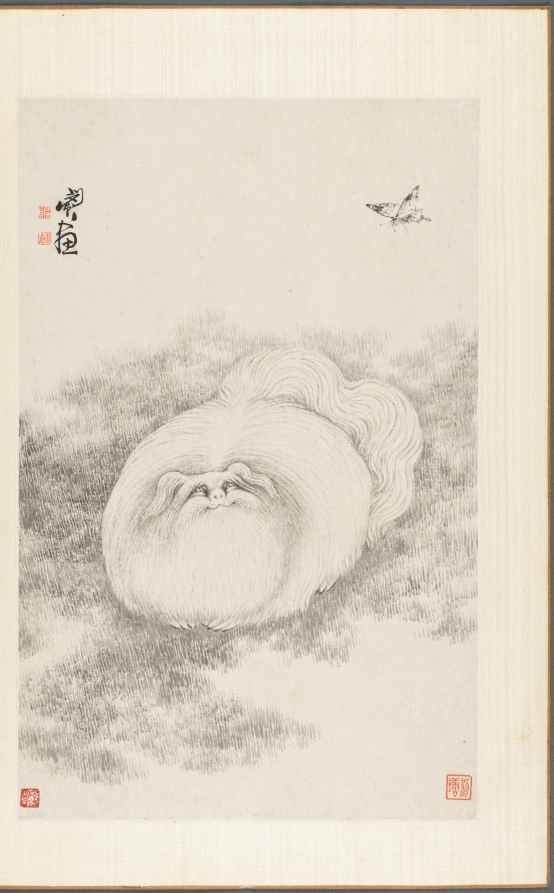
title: Cat and Butterfly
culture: China, Qing dynasty (1644-1911)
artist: Min Zhen (Chinese, 1730–after 1788)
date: 1788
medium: album leaf, ink on paper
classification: Painting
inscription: Six seals appearing on the leaves: Min Zhen 閔貞; Zheng zhai 正齋; Qingqiao 青橋; Zhen 貞; Liao tang 蓼塘; Min Zhen zhi yin 閔貞之印。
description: Min Zhen, who was orphaned at age 12 and developed an eccentric personality, was trained by Tang Yin (1682–1756), a writer, playwright, and superintendent of the imperial porcelain workshops in Jingdezhen. The connection to him may have enabled Min to stay in Beijing for a decade from around 1773. It is not clear whether he ever resided in Yangzhou, but his style is in many instances reminiscent of that of Yangzhou artist Huang Shen. The album was painted for his friend Dailili Shanren in exchange for a scholar’s stone. The paintings demonstrate the artist’s versatility and mature style in the last years of his life. While two leaves are rendered in unconventional compositions seen from above (Cat and Butterfly CMA 1985.71.5) and below (Banana Plant CMA 1985.71.11), they have a humorous touch. “Cat and butterfly” is a homophone for the Chinese characters “mao die,” meaning “octogenarian,” and express the wish for the recipient’s longevity. The banana plant stands for the world of literati but can also allude to Buddhism.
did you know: Cat and butterfly are homophones for the characters “mao die” 耄耋 (octogenarian), so this painting expresses hope that the artist's friend will live a long life.